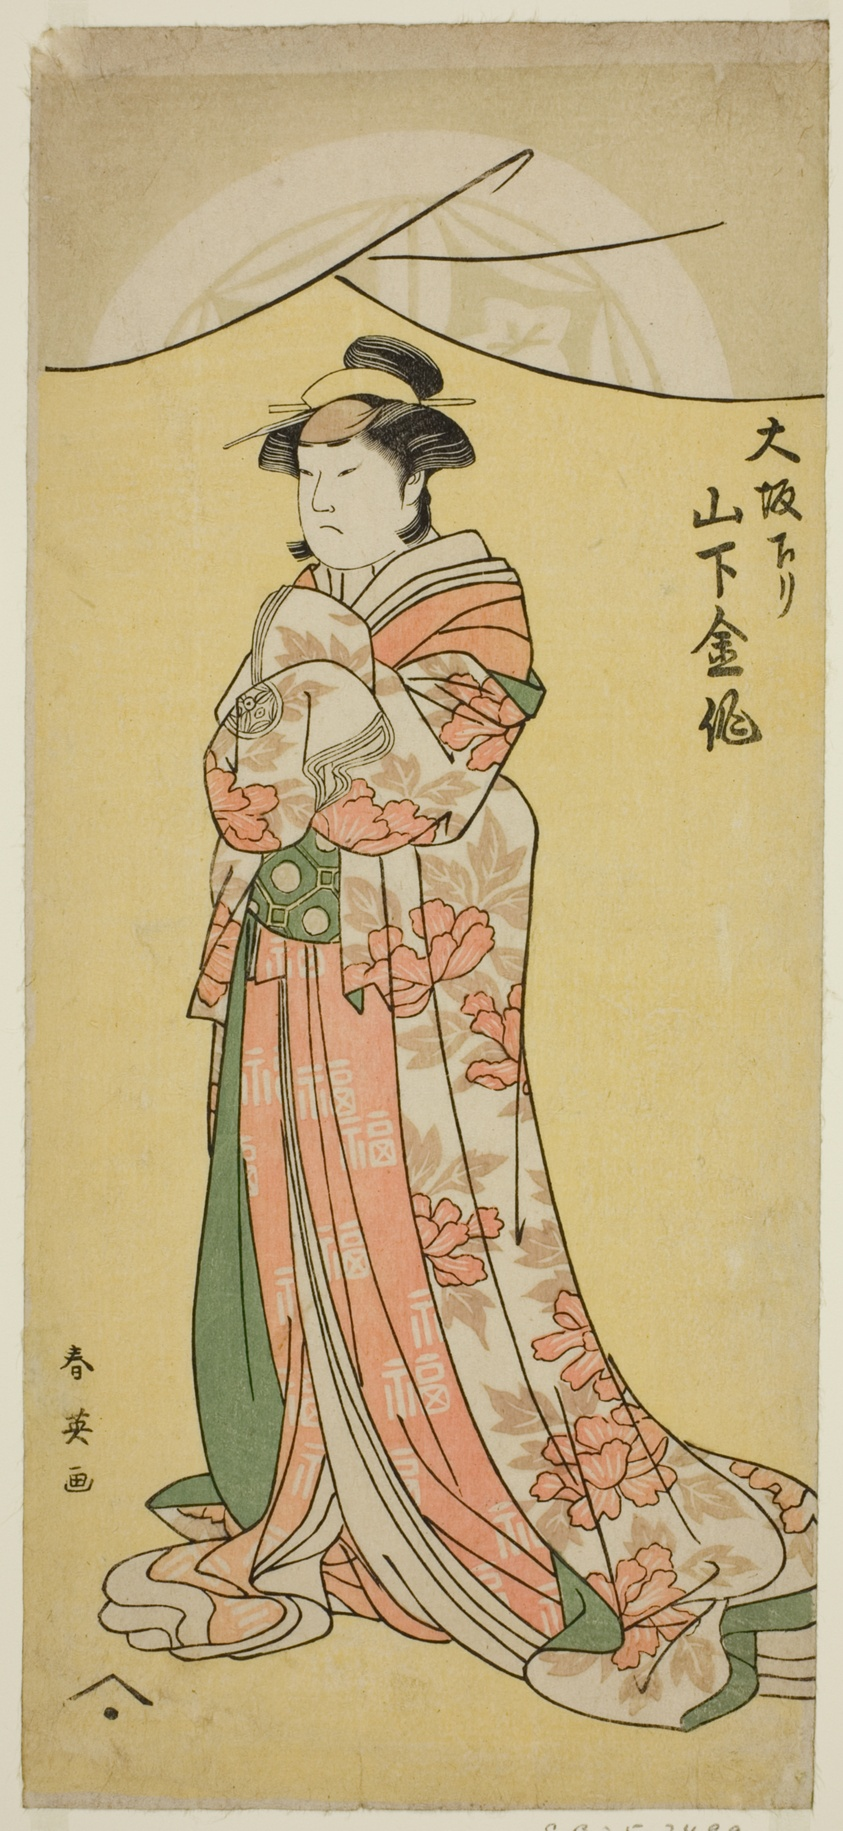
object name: Print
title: The Actor Yamashita Kinsaku II as the maid Tsumagi in the play "Otokyama O-Edo no Ishizue," performed at the Kiri Theater in the eleventh month, 1794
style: Japanese (culture or style)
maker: Katsukawa Shun'ei (Japanese, 1762-1819)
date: c. 1794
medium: Color woodblock print; hosoban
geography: Japan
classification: woodblock print; print; asian art